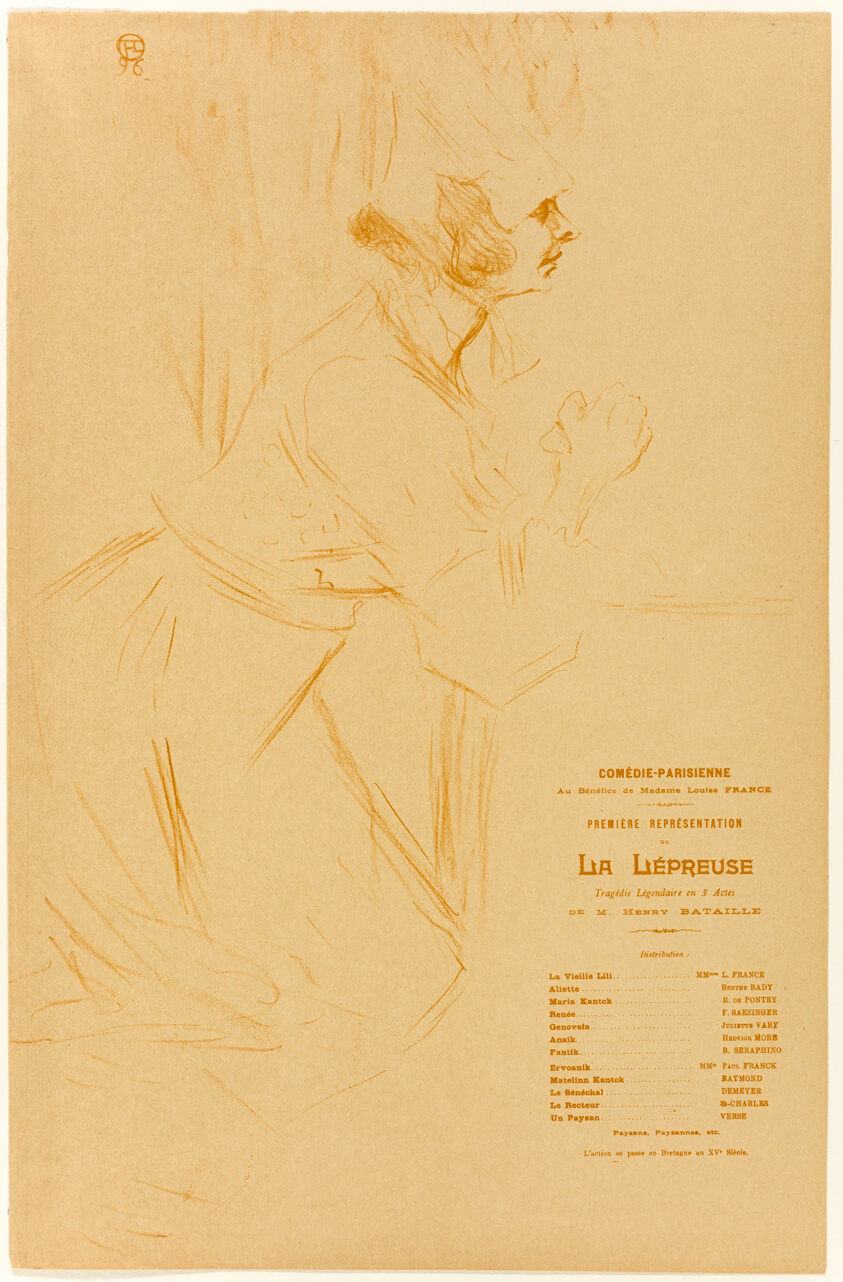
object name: Print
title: Program for La Lépreuse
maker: Henri de Toulouse-Lautrec (French, 1864-1901)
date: 1896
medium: Color lithograph on tan wove paper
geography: France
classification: lithograph; print; prints and drawing